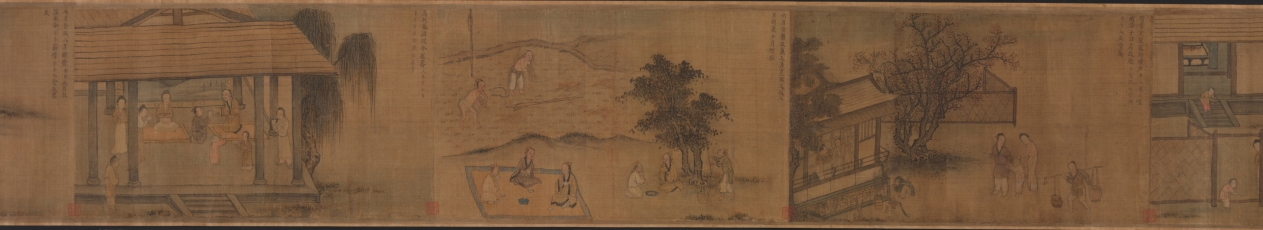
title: "Seventh Month" from the Odes of Bin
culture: China, Southern Song dynasty (1127-1279)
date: 1200s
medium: Handscroll; ink and color on silk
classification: Painting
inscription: Colophons: 1. [on the frontispiece] by the Qianlong emperor (dated 1741). 2. by Lu Wan (dated Zhengde dingchou, 1517). 2. by the Jiaqing emperor (dated 1807).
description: According to Confucian thought, the ruler looks after the well-being of his people which involves agricultural activities. Seventh Month from the ancient Odes of Bin in the Shijing (Book of Poetry) describes occupations throughout the year, including plowing, harvesting, hunting, making clothes, and observing rituals. The earliest illustrations of these Odes accompanied by text were commissioned by Southern Song emperor Gaozong (reigned 1127–1162). As the lower Yangzi delta had become the new seat of government, Gaozong had sets of these illustrations produced by court artists to revive the dynasty and convince the Confucian officialelite of his legitimacy to rule.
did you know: The Odes of Bin appears in the classic Shijing (Book of Poetry), an anthology of more than 300 poems, folk songs, and ceremonial hymns that were originally chanted to music.